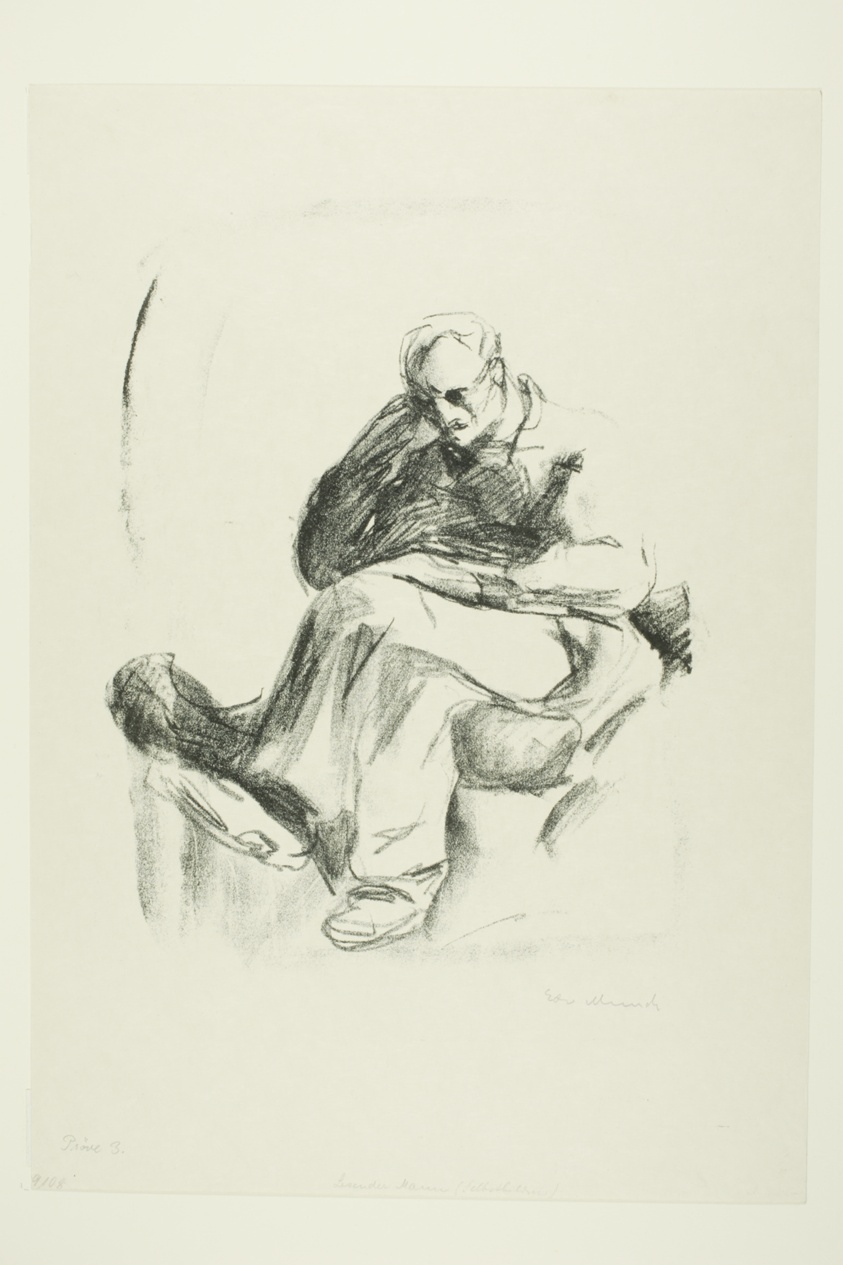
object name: Print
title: Seated Man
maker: Edvard Munch (Norwegian, 1863-1944)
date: 1912–14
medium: Lithograph on cream wove paper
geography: Norway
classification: lithograph; print; prints and drawing